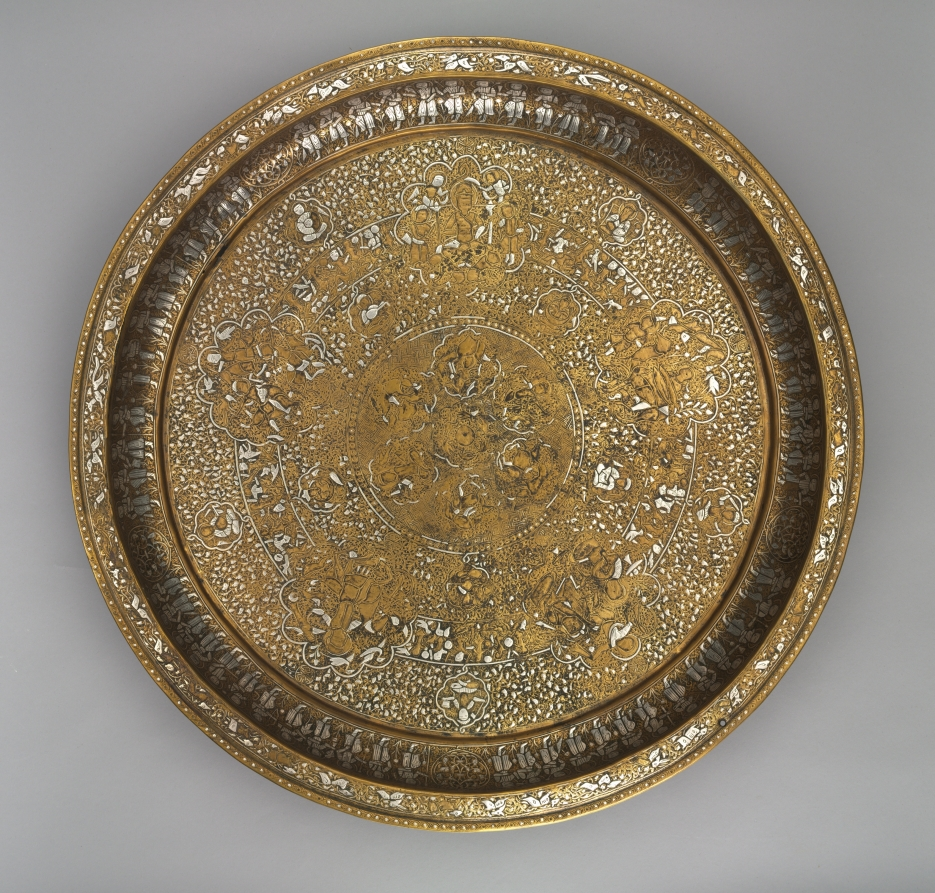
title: Tray Portraying Courtly Pleasures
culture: Syria, Ayyubid period (1171–1260)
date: 1240s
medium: sheet brass inlaid with silver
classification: Metalwork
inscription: The presence of ligatures in the narrow circular bands with interconnected human and animal figures suggests this may be a degenerate form of animated script. It is indecipherable.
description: This tray features images of courtly life interspersed with astronomical symbols. The scenes contained within large multilobed medallions display an enthroned prince with lions at his feet, a banquet, a hunt, dancers, and musicians. Contained within the concentric circles there are also references to solar and lunar motifs, including figures holding sunbursts and lunar crescents. This tray is made of a single sheet of brass and the silver inlay, which is best preserved on the tray’s inner curve, suggests its original brilliance.